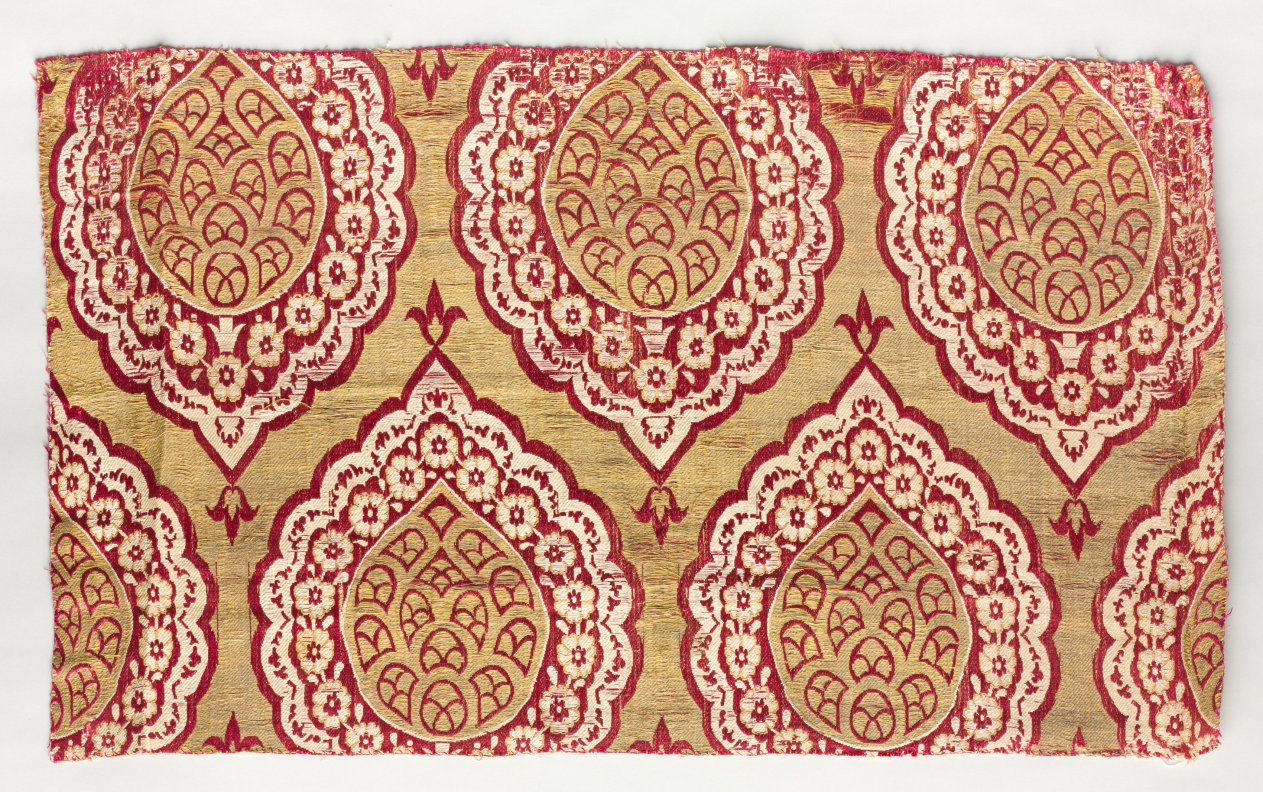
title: Brocade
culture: Turkey, Bursa, first half of 17th Century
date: 1600–1650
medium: brocade, silk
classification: Textile